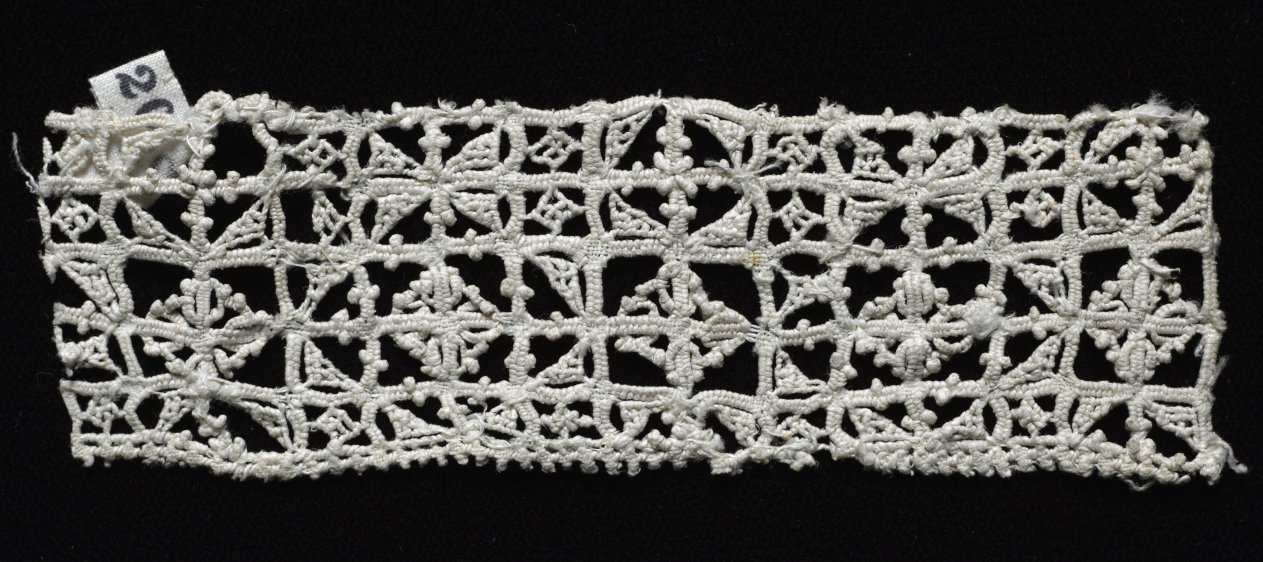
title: Lace Fragment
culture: Italy, Venice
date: 1500s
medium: Linen: needle lace, reticella insertion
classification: Lace